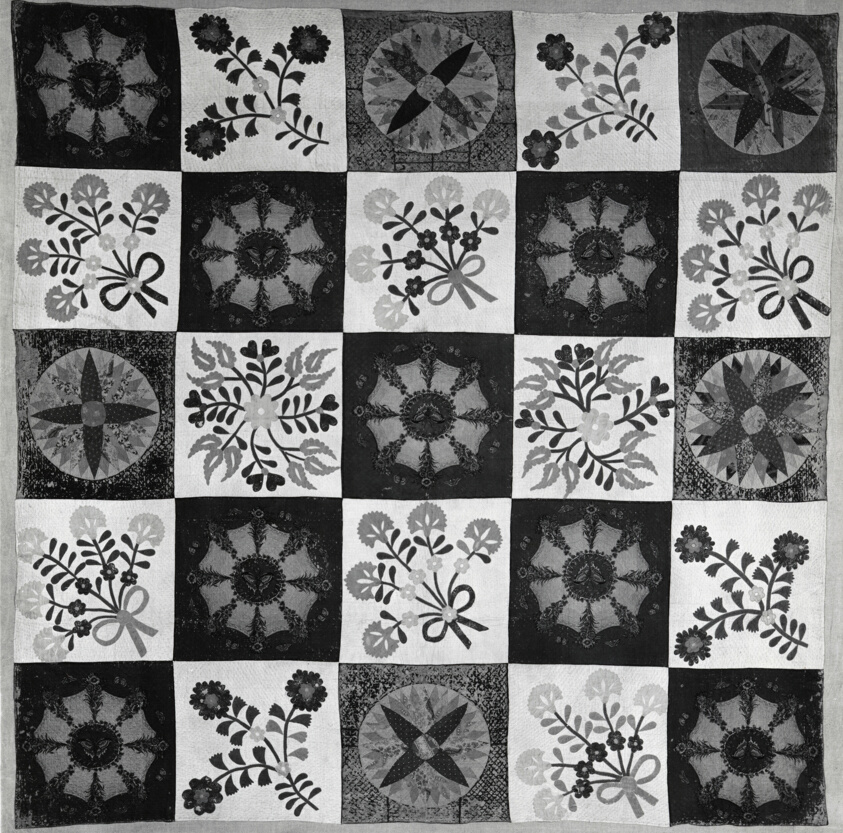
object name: Textile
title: Bedcover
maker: Carolyn A. Ford (American, active c. 1833); United States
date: 1833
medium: Cotton, plain weaves; pieced; appliquéd; some printed; embroidered in buttonhole and herringbone stitches; quilted; backed and overlined with cotton, plain weave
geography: United States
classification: needlework - quilt; textile